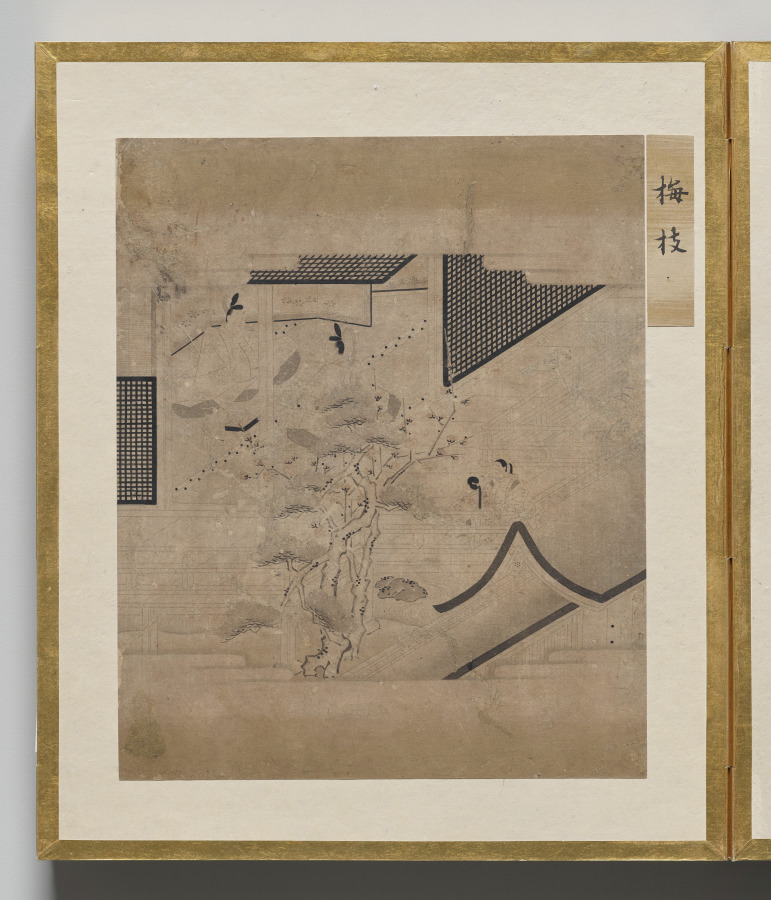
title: Branch of Plum from Album of Illustrations for the Tale of Genji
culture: Japan, Edo period (1615–1868)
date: 1600s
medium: painting in an accordion-style album; ink, light color, and gold on paper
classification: Bound Volume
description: This album contains illustrations for the classic literary work the Tale of Genji, authored in the 1000s by Murasaki Shikibu, an aristocrat of the Heian period (794–1185) court. The scenes are painted in the “white drawing” (hakubyō) mode, in which a fine ink line is used to depict figures and spaces with great subtlety, punctuated only occasionally by traces of red pigment for a character’s lips, a detail of a garment, or a decorative element. These two scenes illustrate episodes from the chapters “Thin Veil of Cloud” (Usugumo) and “Barrier Gate” (Sekiya).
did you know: The illustrations are identified by chapter title in cartouches to the upper right of the paintings.